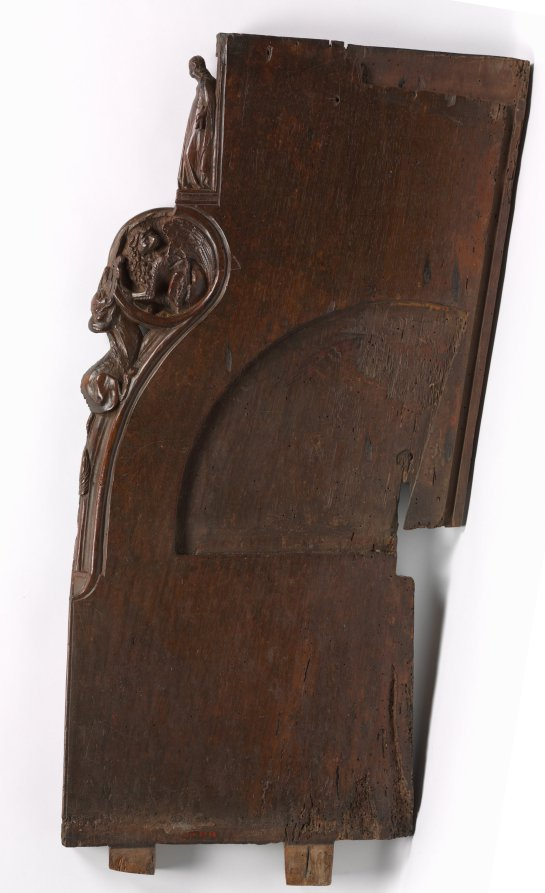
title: Panel from a Choir Stall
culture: Spain, Catalonia, Monastery of Pedralbes, 14th century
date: c. 1330–1340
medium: walnut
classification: Furniture and woodwork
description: The smaller panel here originated from an interior portion of a choir stall. The panel depicts a female figure in a long gown standing on a plinth above two of the apocalyptic beasts, the winged lion of Saint Mark and the winged ox of Saint Luke, which are supported by a wyvern (a heraldic winged dragon).